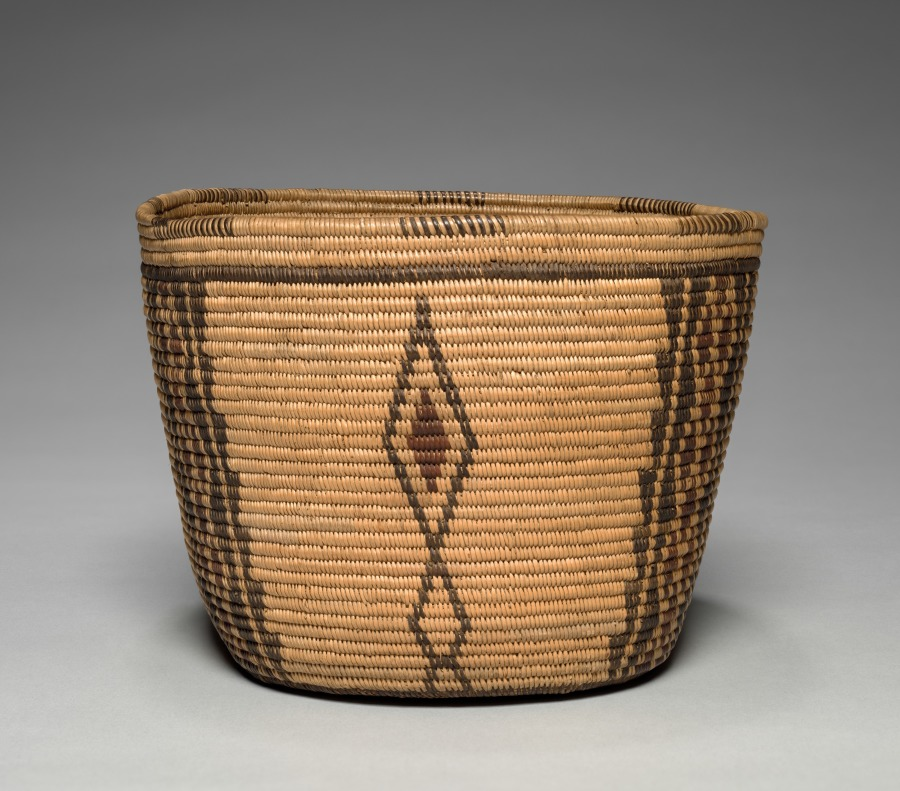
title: Bowl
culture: Great Basin, Timbisha Shoshone (Panamint)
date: c 1900–1910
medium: willow, devil's claw, yucca root; coiled (3 rods)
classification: Basketry